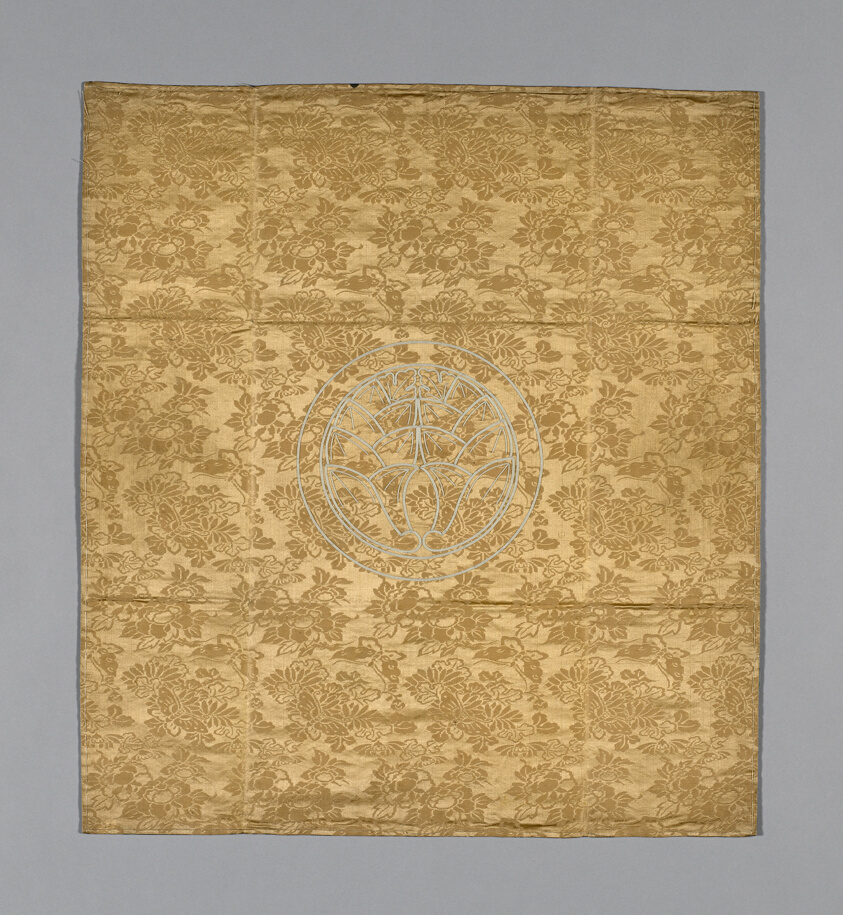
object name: Textile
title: Fukusa (Gift Cover)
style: meiji, Japanism, East Asian, asian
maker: Japan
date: early Meiji period (1868–1912), 1868/83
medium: Mon side: silk, warp-float faced 7:1 satin weave self-patterned by areas of weft-float faced 1:3 'Z' twill interlacings; embroidered with silk, laidwork and couching Lined with silk, warp-float 4:1 satin weave (shusu); sewn with front and lining matched in size (Tachikiri awase); silk, running "controlling" stitches along all edges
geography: Japan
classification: textile; weaving